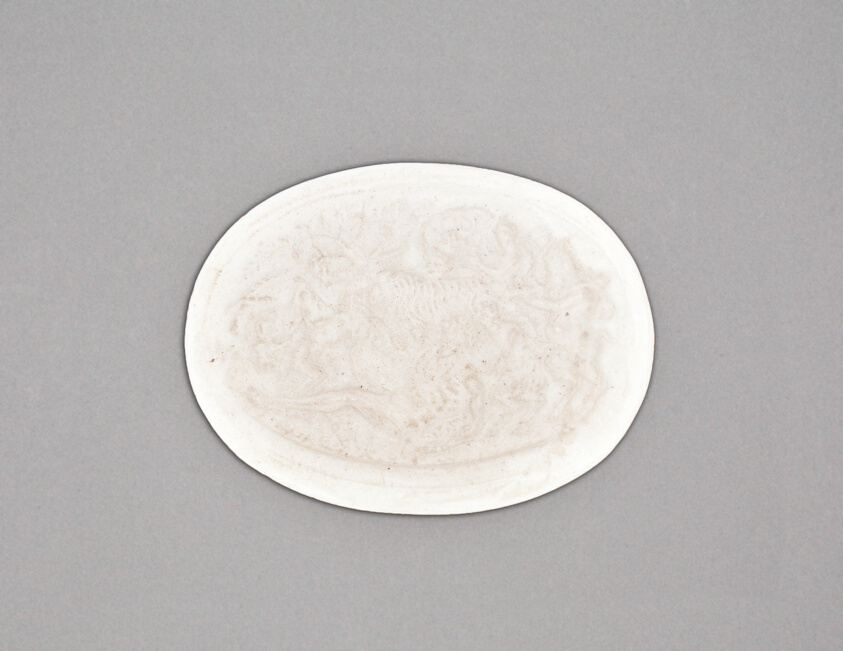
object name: Ceramics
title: Cameo with Hercules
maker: Wedgwood Manufactory (England, founded 1759)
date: Late 18th century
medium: Stoneware (jasperware)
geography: Burslem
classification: cameo (sculpture); sculpture; stoneware; european decorative arts; ceramics